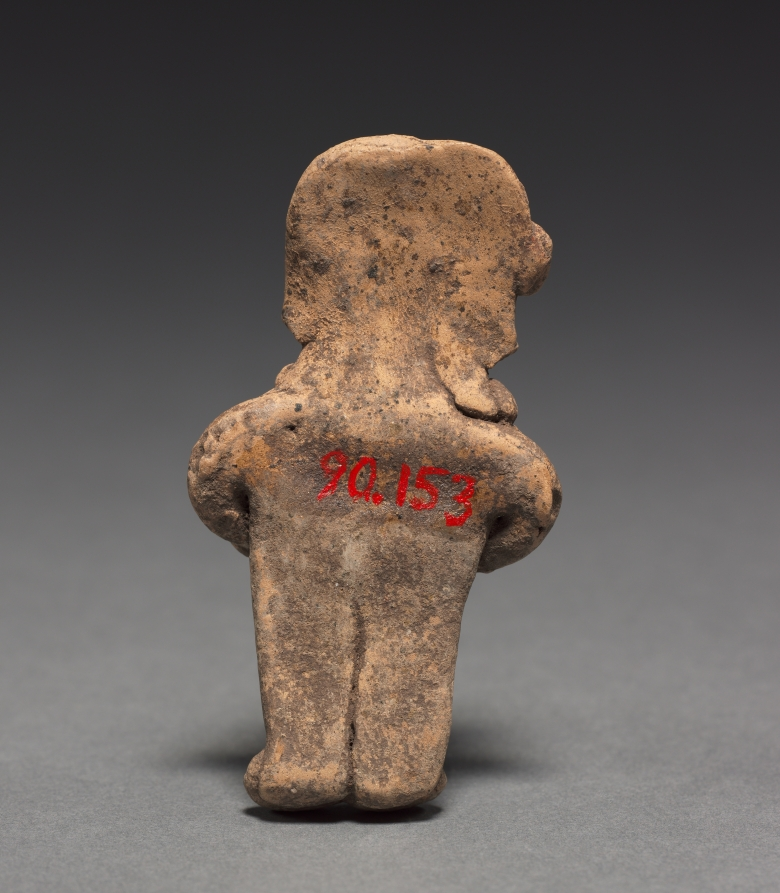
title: Male Figurine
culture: Mesoamerica, Mexico, Guanajuato, Chupícuaro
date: c. 400–100 BCE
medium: earthenware with pigments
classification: Sculpture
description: The Chupícuaro culture, located north of Mexico City in the state of Guanajuato, created a distinctive ceramic tradition including small clay figurines. This example is said to belong to a group of ten figurines from the same burial or cache (1990.145–154). The group includes both males and females that can be sorted into couples based on size.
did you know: Groups of figurines were sometimes arranged in scenes and likely used in household rituals.